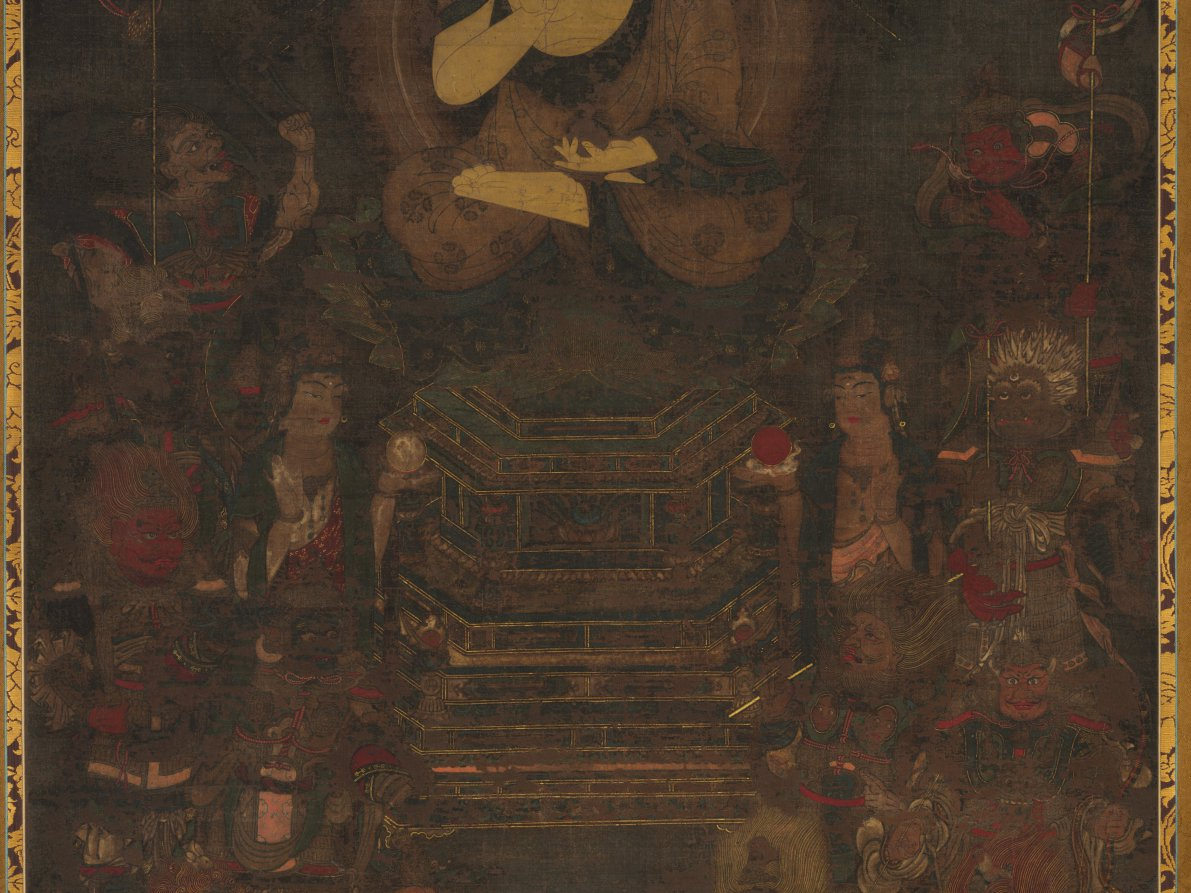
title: Medicine Master Buddha and the Twelve Divine Generals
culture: Japan, Kamakura period (1185–1333)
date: 1200s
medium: Hanging scroll painting; ink, color, gold, and silver on silk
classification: Painting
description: From the 700s, people in Japan began praying to the Medicine Master Buddha (Yakushi Nyorai) for longevity. Yakushi is at the center of this image, flanked by the bodhisattvas of the sun and moon, Nikkō and Gakkō. The Twelve Divine Generals, a group of protective deities, surround him. Yakushi sits in a meditative pose with his right hand in a gesture bestowing fearlessness while his left hand holds a medicine jar. In the upper part of the painting, rectangles simulating decorative paper inscription slips contain excerpts from a sacred text about Yakushi, in which he asks that sick people who speak his name should become well and that all who hear his name might have their purity restored.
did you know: Each of the Divine Generals has an identifying zodiac animal in his hair or headdress.